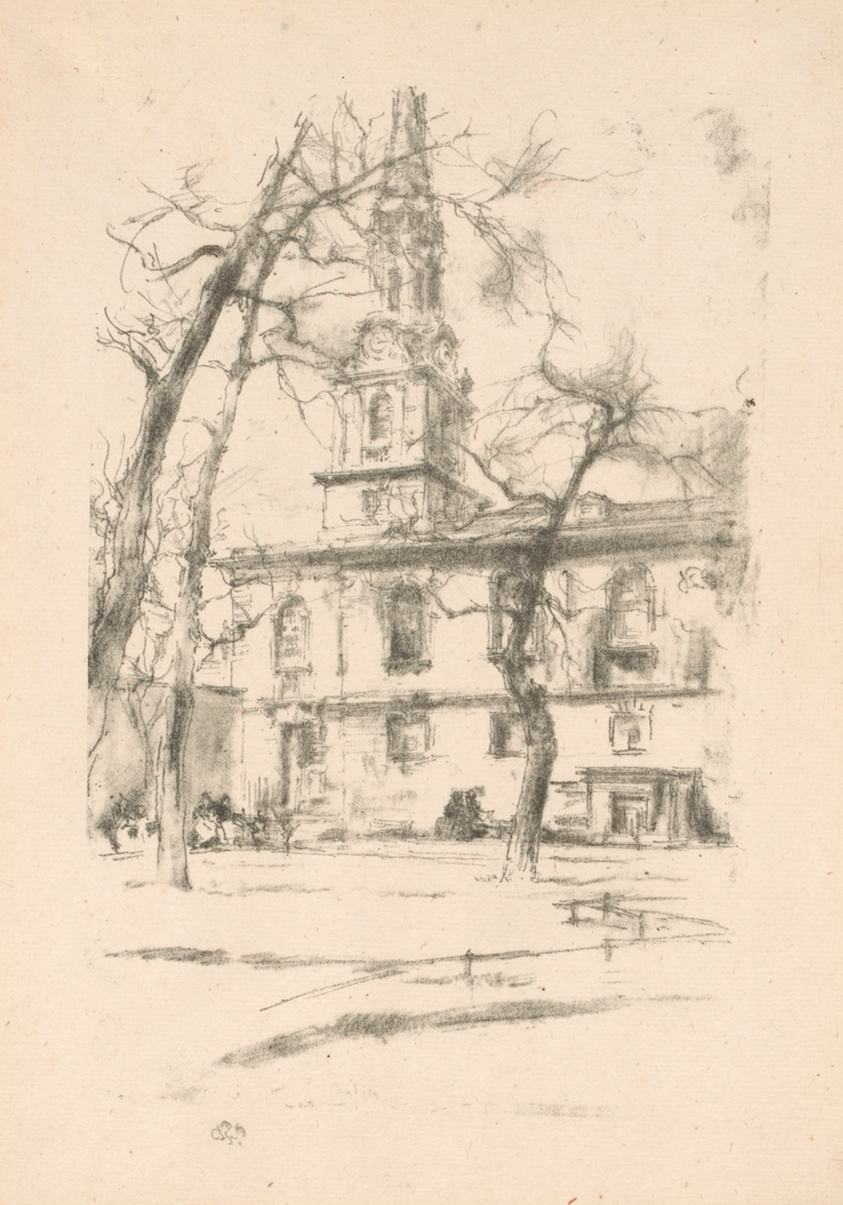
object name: Print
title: St. Giles-in-the-Fields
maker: James McNeill Whistler (American, 1834-1903)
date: 1896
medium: Transfer lithograph in black, with stumping, on cream laid paper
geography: United States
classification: transfer lithograph; lithograph; print; prints and drawing; paper